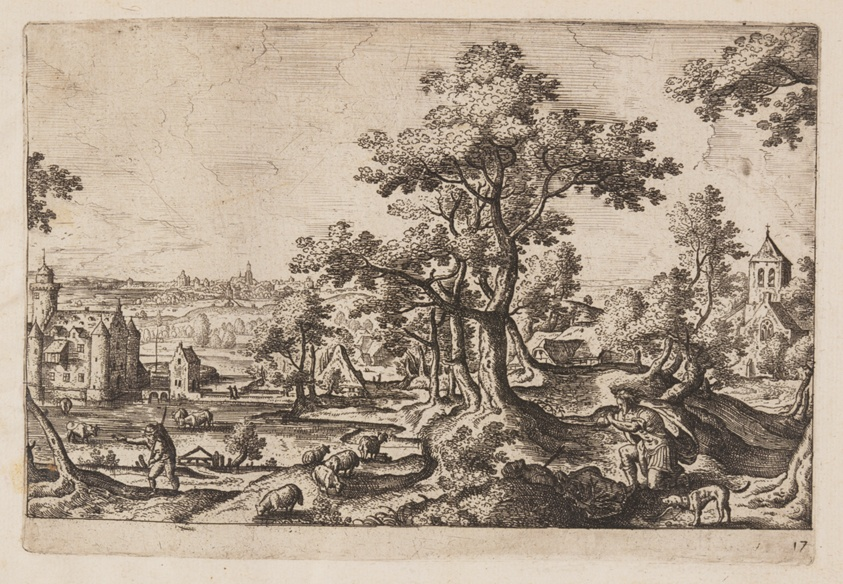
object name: Print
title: Plate 17, from Landscapes with Scenes from the Old and New Testament and Ovid’s Metamorphoses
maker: Hans Bol (Flemish, 1534–1593); published by Philip Galle (Flemish, 1537–1612)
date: 1574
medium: Etching on ivory laid paper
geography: Flanders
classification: print; paper; prints and drawing; etching